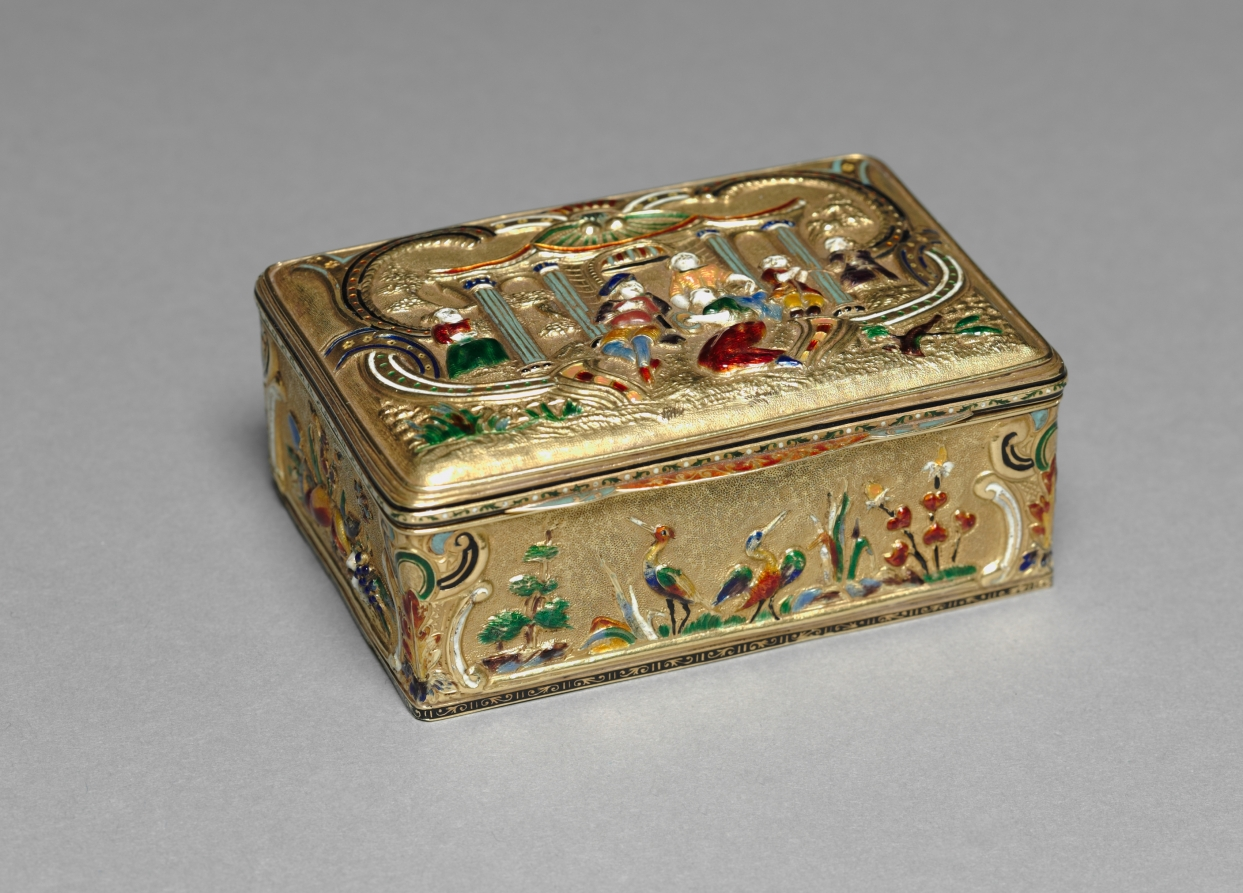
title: Snuff Box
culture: Continental, 19th century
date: 1800s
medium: gold box decorated with polychrome, repousse enamel figures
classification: Miscellaneous